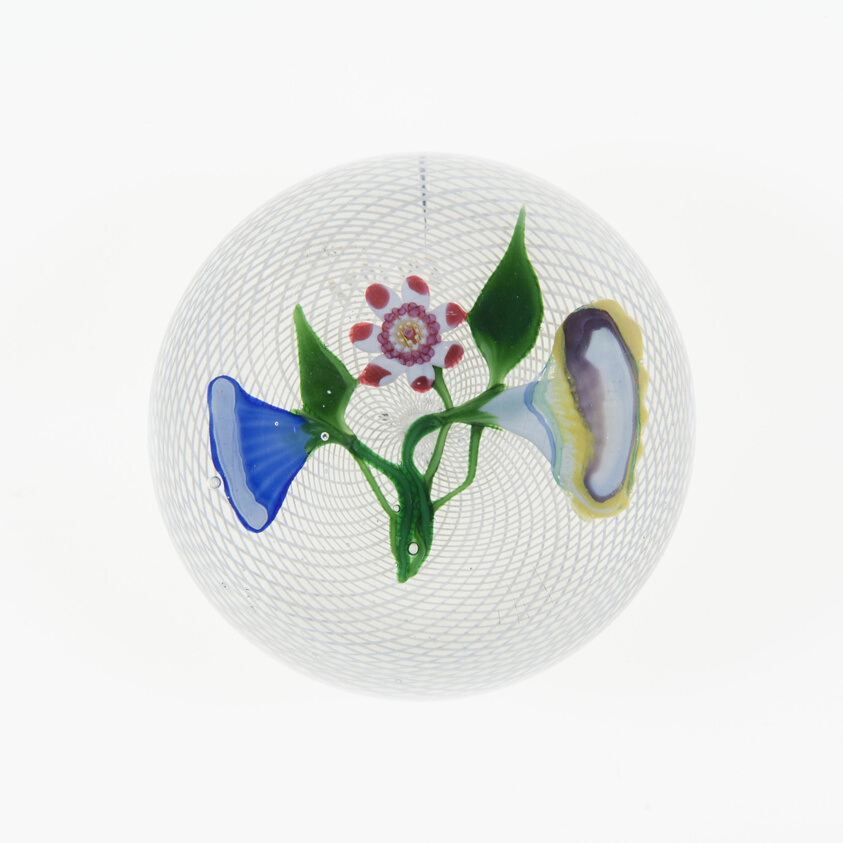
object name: Glass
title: Paperweight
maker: Clichy Glassworks (Cristalleries de Clichy); Clichy, France, 1837-1885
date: c. 1848/55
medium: Glass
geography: France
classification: paperweight; glass